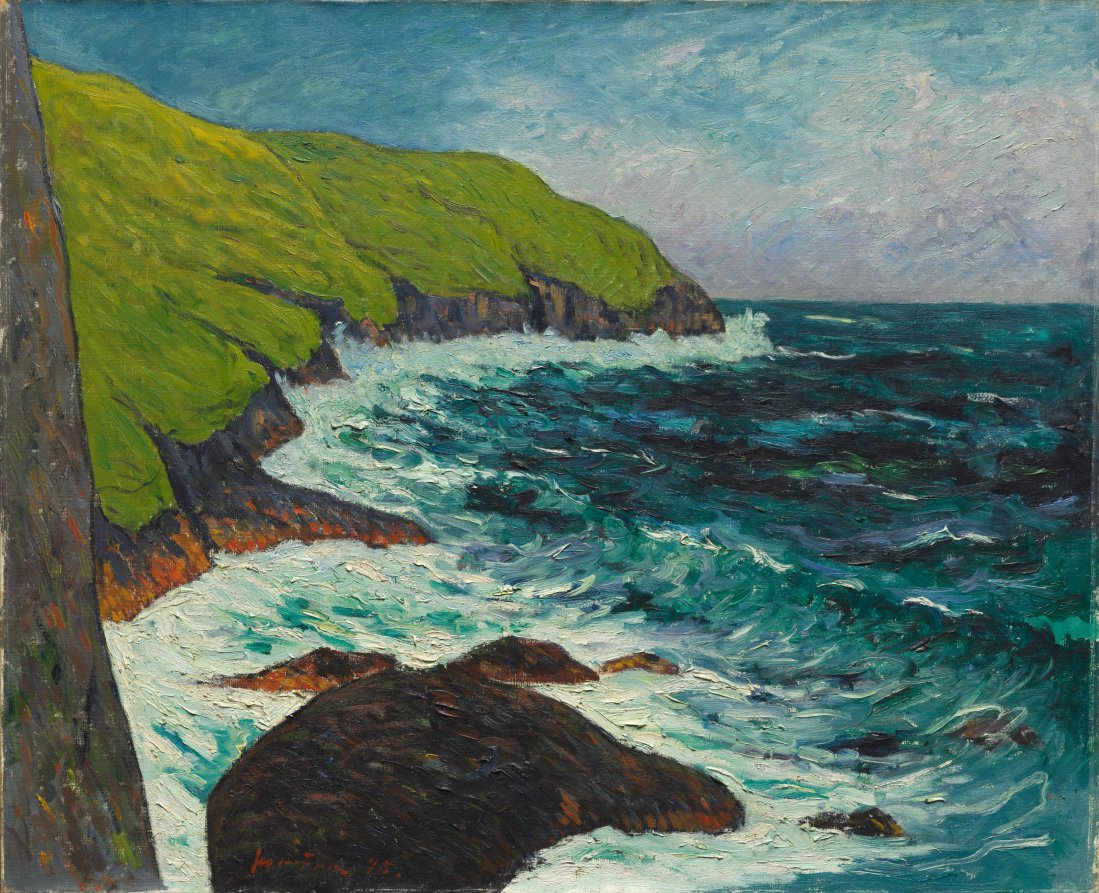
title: The Cliffs at Beg-ar-Fry, Saint-Jean-du-Doigt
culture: France, 19th century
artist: Maxime Maufra (French, 1861–1918)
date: 1895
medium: oil on fabric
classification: Painting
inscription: Signed lower left: Maufra 95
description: Maxime Maufra was initially an amateur artist, but in 1883 he gave up a career in business to devote himself entirely to painting. He traveled throughout Normandy and Britany painting sea- and landscapes. During a visit to Pont-Aven in northwestern France in 1890 he met Paul Gauguin and a group of young artists who were inspired by Gauguin’s approaches to color and composition in his art. In particular, Maufra began to translate forms into flat planes of bold color arranged in decorative patterns as seen in this seascape of the Breton coast. Perhaps the most striking aspect of this painting is the way the artist framed the composition at the left with the view of a steep cliff.